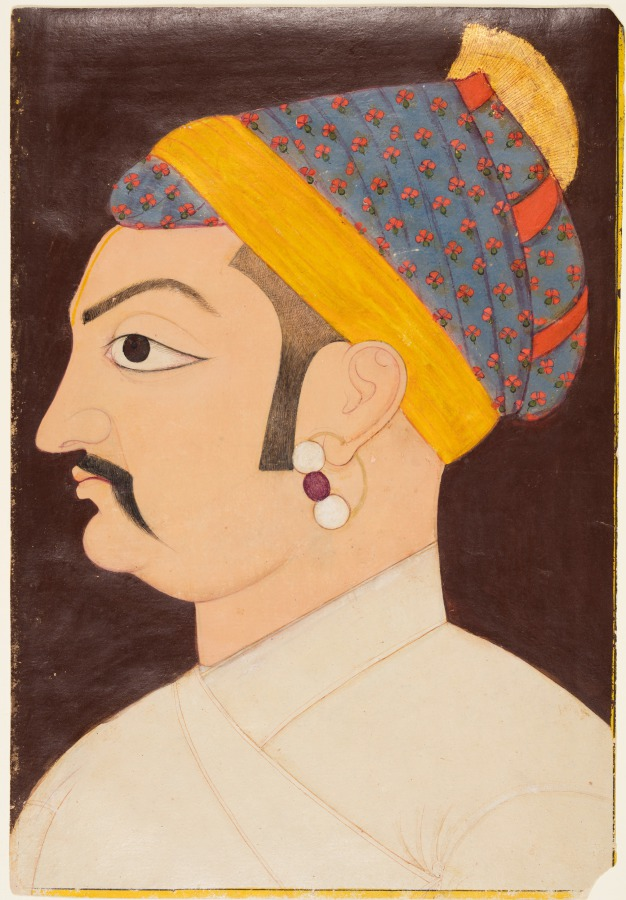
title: Portrait of Rao Shiv Singh Chandrawat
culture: Northwestern India, Rajasthan, Marwar, Rajput Kingdom of Jodhpur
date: c. 1720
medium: Gum tempera and gold on paper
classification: Painting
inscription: rāva so saṃgha caṃdrāvata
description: The bust portrait of a Rajput ruler shows him wearing a blue turban with floral pattern and white garment. A costly pearl and ruby earring suggests his financial affluence. The artist has exhibited his skill in the sensitive rendering of the figure’s eyebrow and mustache.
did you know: Rao Shiv Singh’s granddaughter was married to Maharaja Pratap Singh of Jaipur (CMA 2011.207).